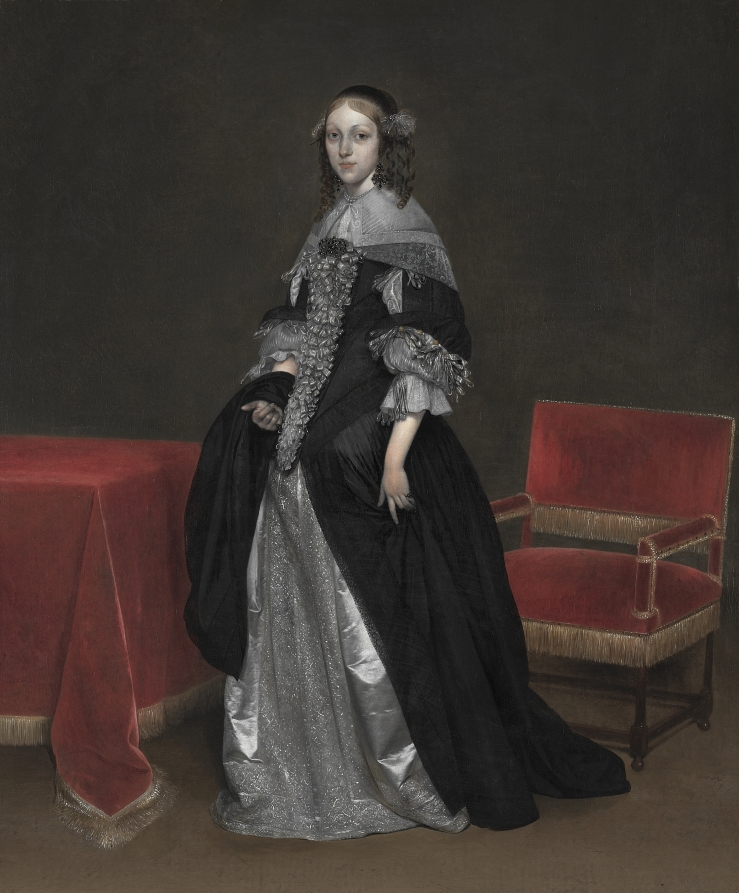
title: Portrait of a Woman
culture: Netherlands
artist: Gerard ter Borch (Dutch, 1617–1681)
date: c. 1665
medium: oil on canvas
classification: Painting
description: Every detail of his subject’s elaborate costume is skillfully recorded: glittering jewels, filmy lace, knots of ribbons, heavy black silk, and shimmering white satin. The ability to recreate satin’s luster was Gerard ter Borch’s particular trademark: he used fine flicks and sweeps of the brush, occasionally adding and wiping away tiny bits of paint to make the white fabric appear to shine. Ter Borch offset the profusion of costume detail by deliberately isolating the figure within a spare setting, allowing us to appreciate the woman’s cool composure. Although her identity is not known, she was undoubtedly a member of the wealthy Dutch elite.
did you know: The pair to this painting (in the National Gallery, London), depicts a man in equally fashionable dress.